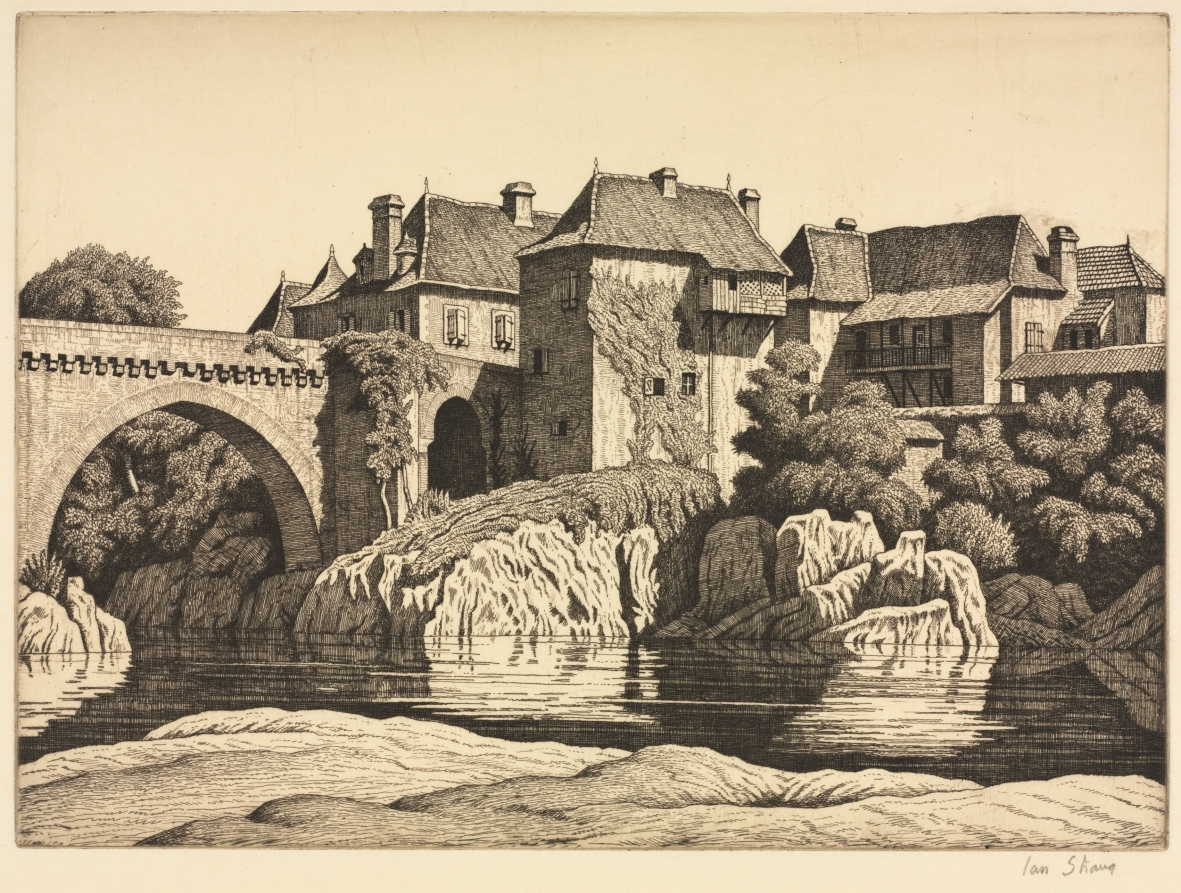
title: Houses by the Bridge, Orthez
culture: England, 20th century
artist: Ian Strang (British, 1886–1952)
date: 1926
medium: etching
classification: Print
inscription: Lower right, in pencil: "Ian Strang" verso, bottom left corner: printed label affixed: "IAN STRANG, R.E. / Houses by the Bridge, Orthez (Etching)"